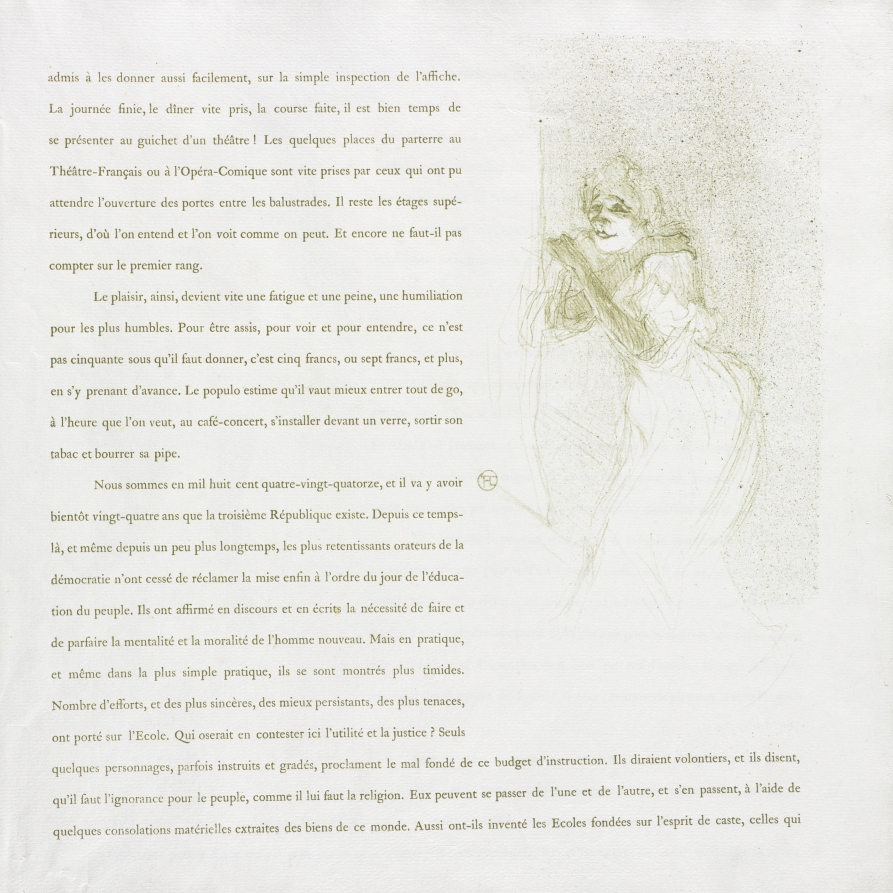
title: Yvette Guilbert-French Series: No. 5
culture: France, 19th century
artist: Henri de Toulouse-Lautrec (French, 1864–1901)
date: 1894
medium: lithograph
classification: Bound Volume